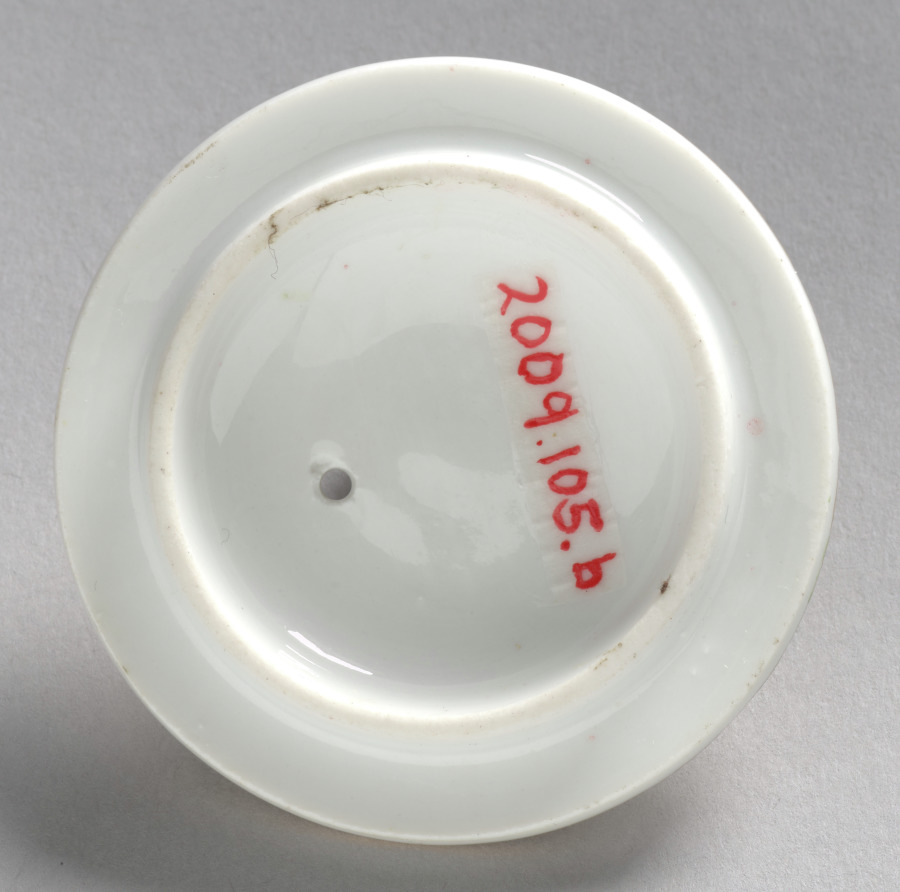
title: Lid for a Teapot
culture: Germany, Meissen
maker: Meissen Porcelain Factory (German, est. c. 1710)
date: c. 1750–70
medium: porcelain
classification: Ceramic